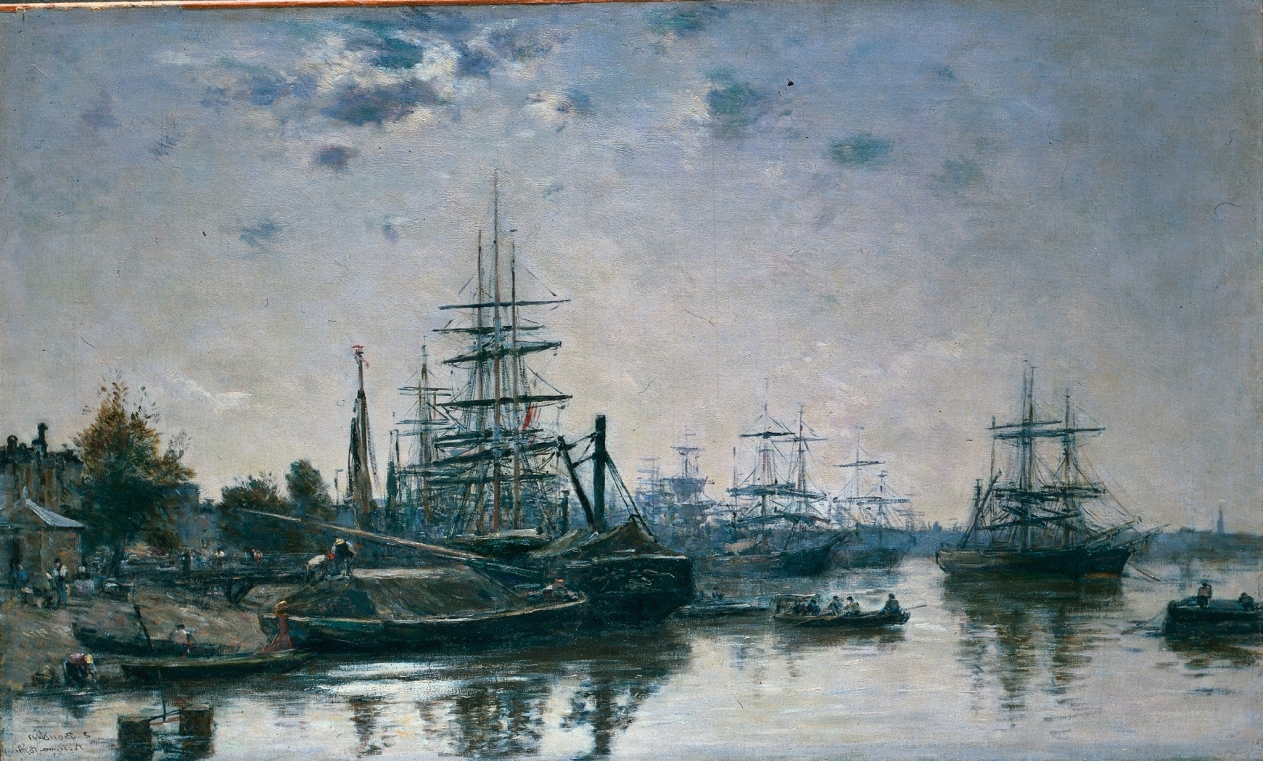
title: View of Bordeaux, from the Quai des Chartrons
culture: France, 19th century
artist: Eugène Boudin (French, 1824–1898)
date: 1874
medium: oil on fabric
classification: Painting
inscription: Signed lower right: E. Boudin / Bordeaux 1874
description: In 1873, Boudin made his first visit to the important port city of Bordeaux as a guest of the resident art collector Arthur Bourges. Between 1874 and 1876, Boudin made paintings of the city's harbor and docks. This was an especially stimulating time in Boudin's career, as he was invited to exhibit in 1874 with the newly-founded Société anonyme des artistes, soon to be known as the Impressionists. As in many of his views, Boudin concentrated here on the quais or working docks where goods were loaded and unloaded and sailors left in small dinghies for the larger vessels on which they worked. The low horizon line relegates much of the canvas to pure sky, but the soaring vertical and diagonal forms of the masts complement this horizontal thrust and open space. Many contemporaries greatly admired Boudin's ability to paint skies. Here, one can see the way in which he brushed on a tan color, then went over it, probably while it was still wet, with a thin but opaque application of white, to create a fresh, airy quality. For the darker areas representing water, Boudin laid in an olive-green tone.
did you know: Pentimenti, the visible trace of earlier painting, appears among the diagonal rigging of the small ship at the left, indicating that the artist did not thoroughly work out his composition before beginning his picture and slightly changed the position of these lines while painting.